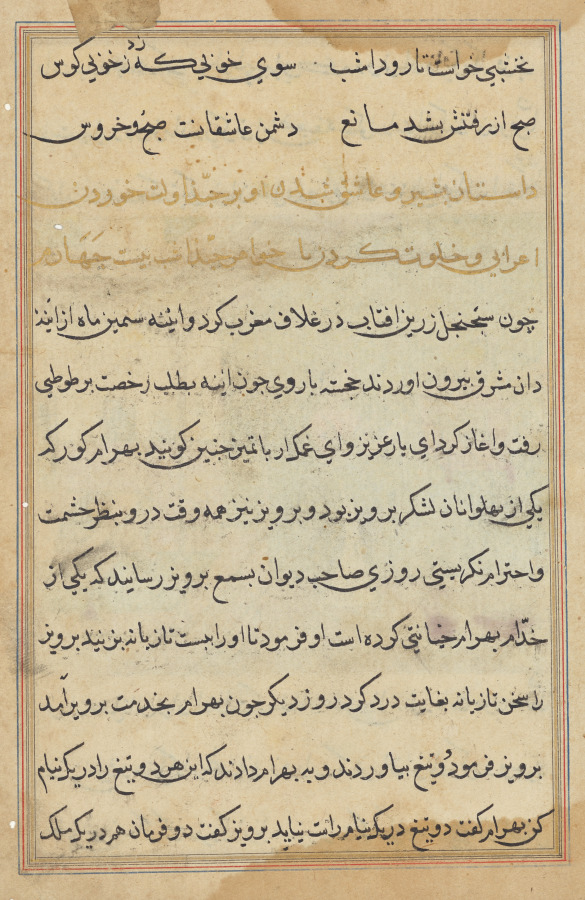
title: Page from Tales of a Parrot (Tuti-nama): text page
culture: Mughal India, court of Akbar (reigned 1556–1605)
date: c. 1560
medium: gum tempera, ink, and gold on paper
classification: Painting